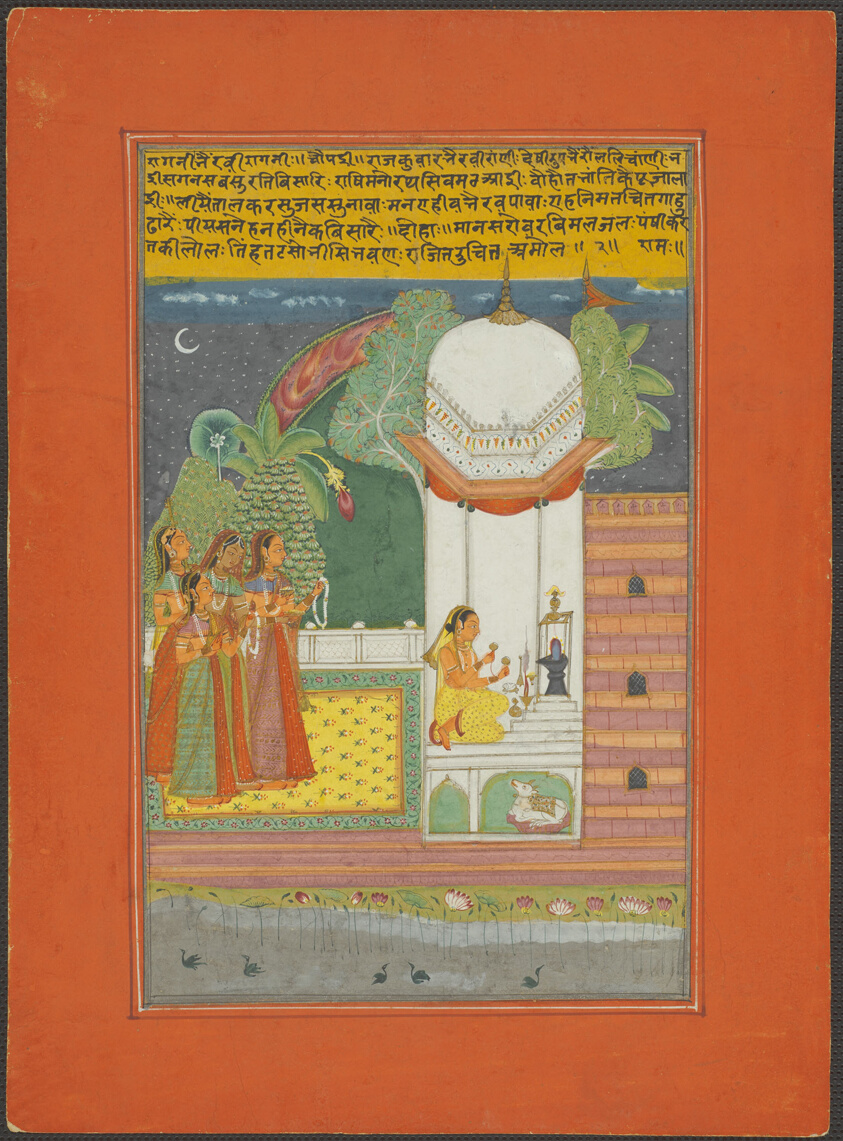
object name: Painting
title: Ragini Bhairavi, Page from a Jaipur Ragamala Set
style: South Asian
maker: India; Rajasthan, Jaipur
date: c. 1750-1770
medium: Opaque watercolor and gold on paper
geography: Rajasthan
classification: miniature painting; painting; asian art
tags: music, musicians